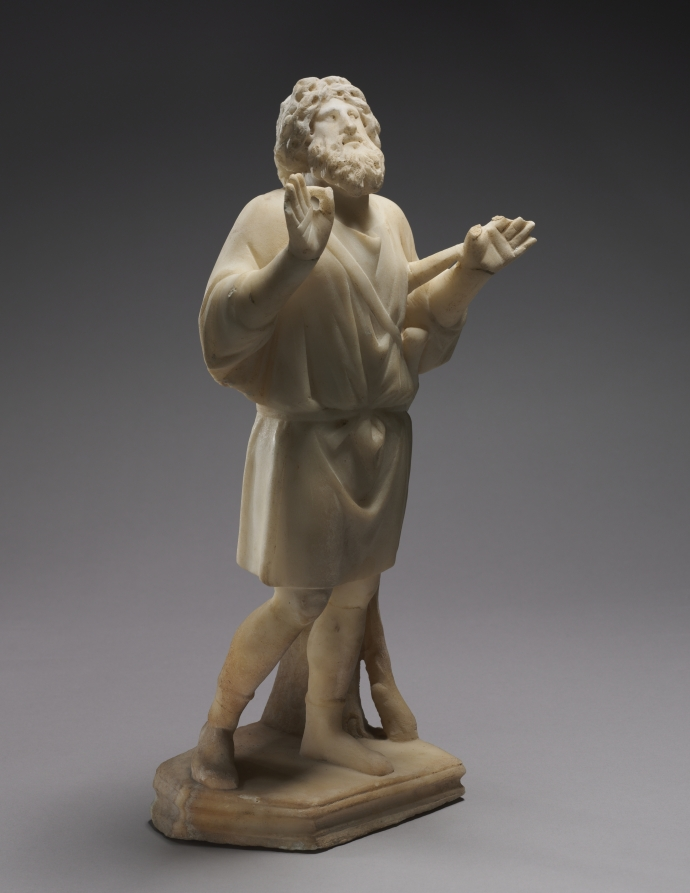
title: Jonah Praying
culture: Anatolia, late Roman-early Christian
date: 280–90 CE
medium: marble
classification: Sculpture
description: The Old Testament prophet Jonah is shown with his hands raised in prayer. It is unclear which moment of the biblical story of Jonah is depicted here. He may be praying in the belly of the sea monster. He might likewise be pleading with the Lord for the city of Nineveh’s destruction or lamenting the withering of the gourd beneath which he sought shelter after fleeing Nineveh.